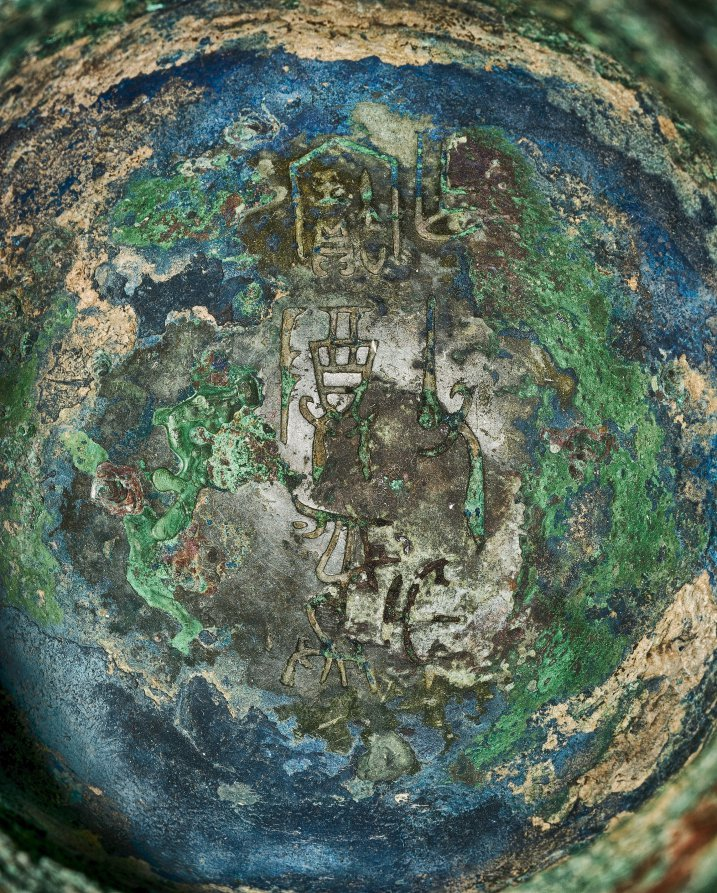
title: Wine Vessel (Fu Wu Zun)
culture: China, Western Zhou dynasty (c. 1046–771 BCE)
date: c. 1000–900 BCE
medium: bronze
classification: Metalwork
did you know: This vessel is decorated with dragons and taotie, a stylized monster face motif frequently found on ancient Chinese ritual bronzes.